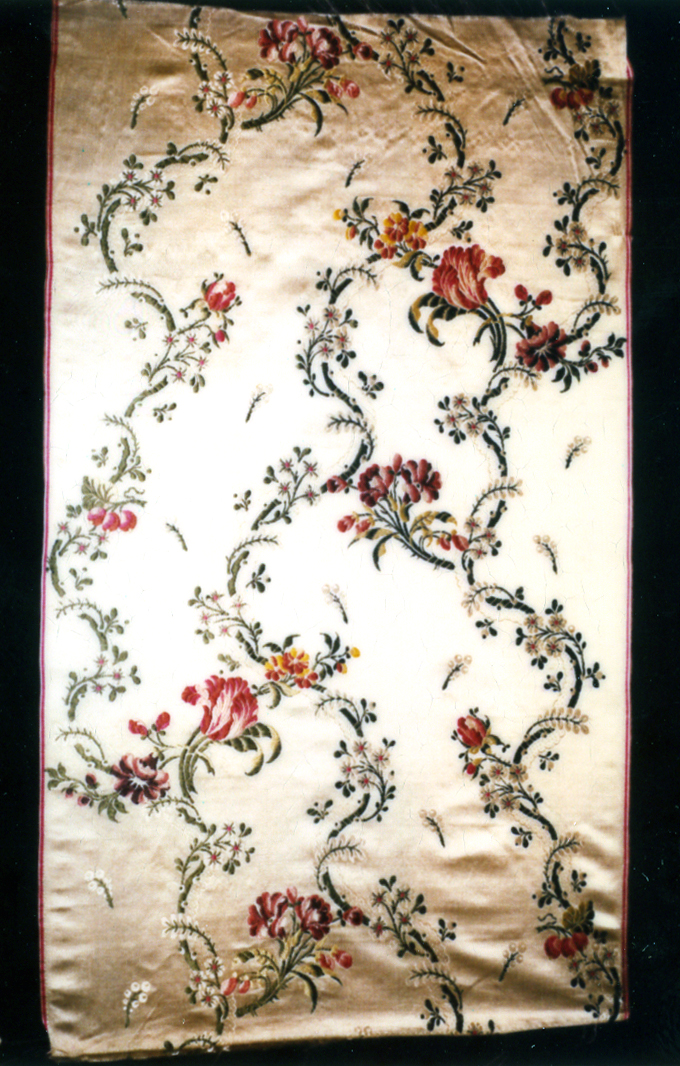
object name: Textile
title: Panel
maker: England, Spitalfields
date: 1725/75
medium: Silk, satin weave with brocading wefts and self-patterned by ground weft floats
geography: England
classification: textile; weaving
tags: flowers, foliage